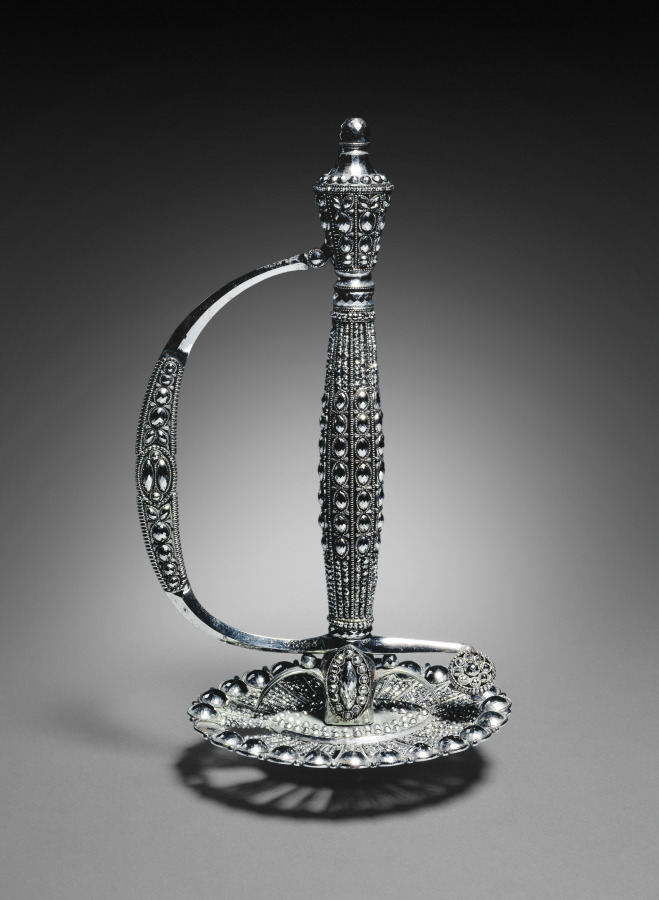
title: Hilt from a Court Sword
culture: England, late 18th Century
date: c. 1790–1800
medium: polished steel, pierced and inset with faceted steel beads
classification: Arms and Armor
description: The entire hilt is made of polished steel, with faceted steel beads of different sizes arranged in rows and rosettes to give the impression of a "jeweled" hilt. This was an object of great luxury to be worn only with a gentleman's formal attire at court.